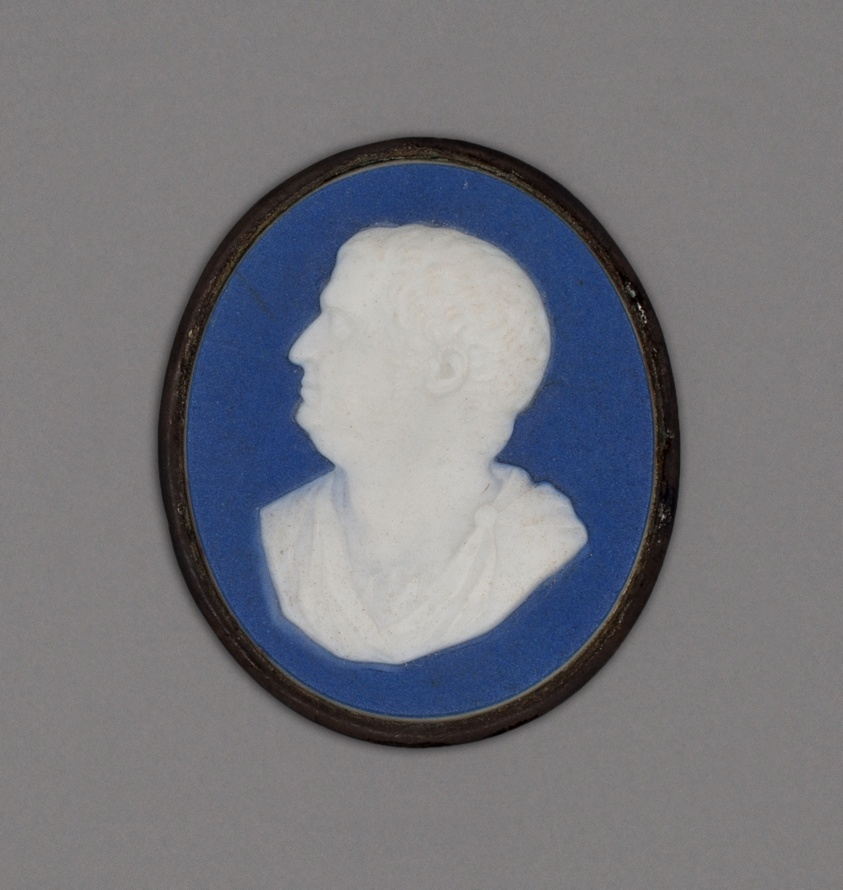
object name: Ceramics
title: Medallion with Roman Emperor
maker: Wedgwood Manufactory (England, founded 1759)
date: Late 18th century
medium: Stoneware (jasperware)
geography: Burslem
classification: sculpture; stoneware; european decorative arts; ceramics